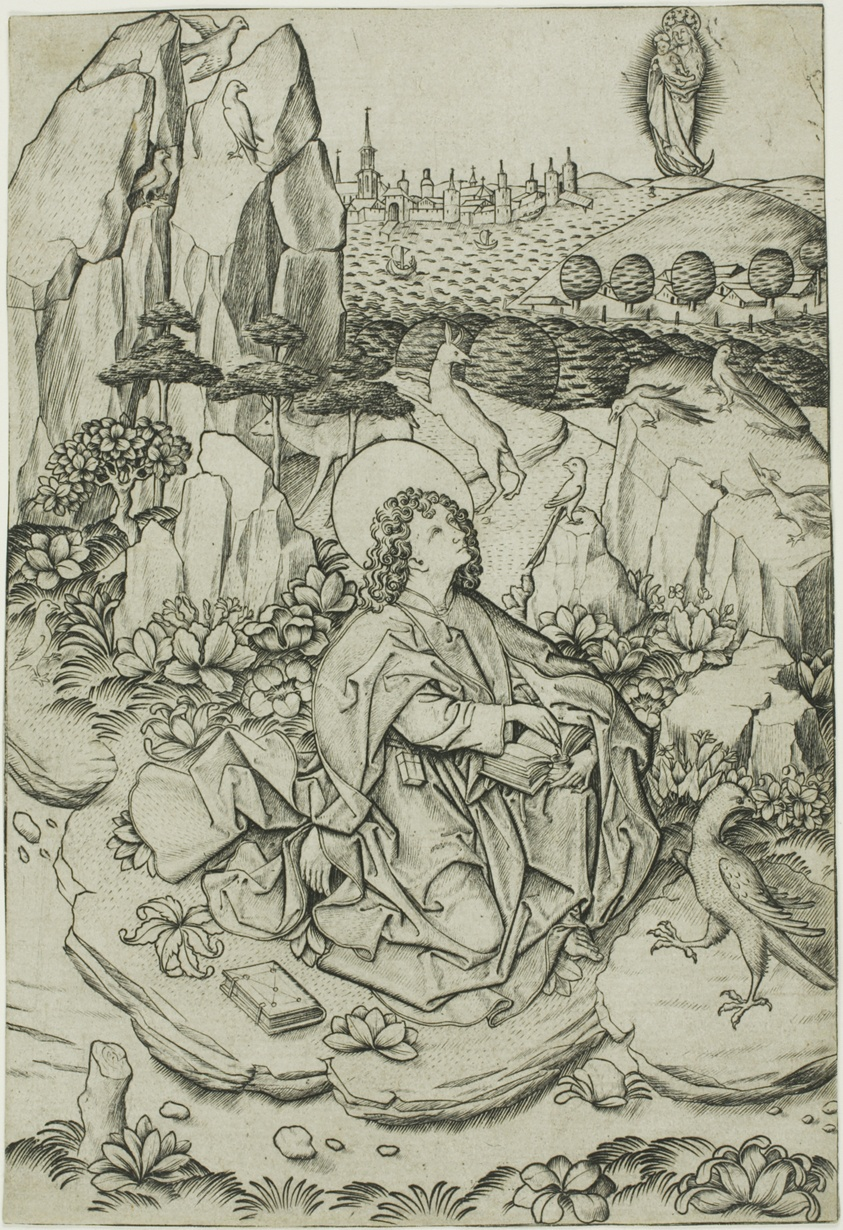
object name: Print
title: Saint John on the Island of Patmos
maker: Master E. S.; German, active c. 1450-1467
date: c. 1460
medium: Engraving printed in black, on paper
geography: Germany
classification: engraving; print; prints and drawing